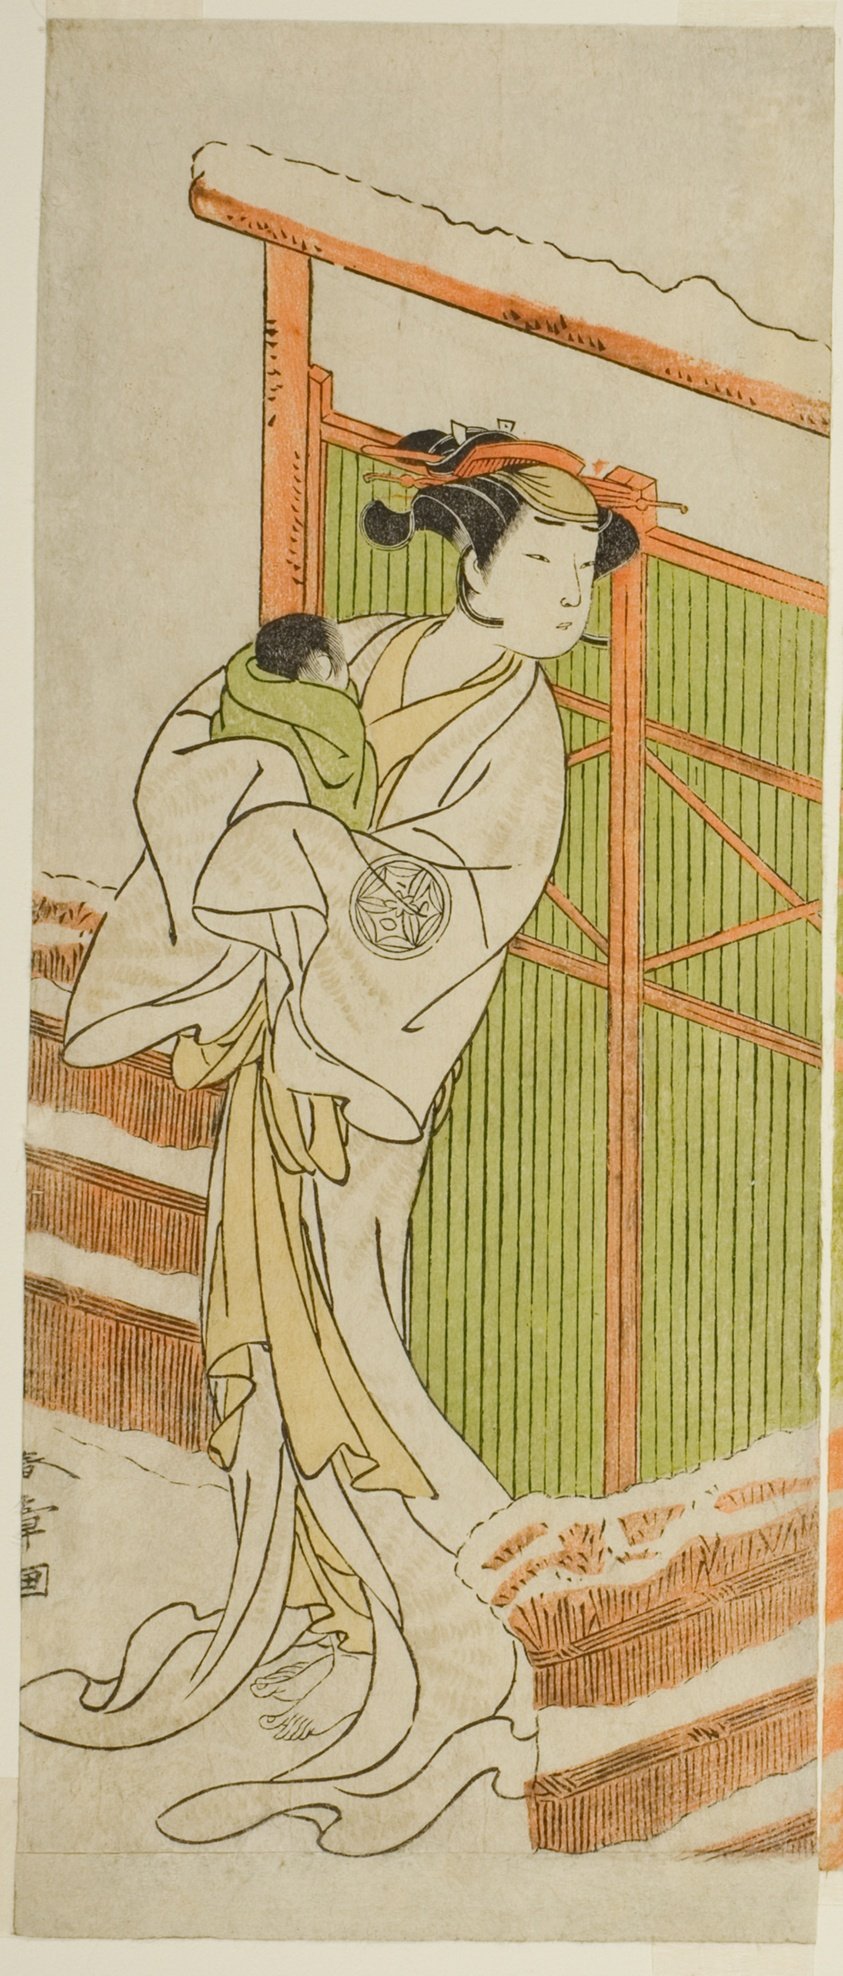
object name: Print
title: The Actor Yamashita Kinsaku II as Moshio in the Play Izu-goyomi Shibai no Ganjitsu, Performed at the Morita Theater in the Eleventh Month, 1772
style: Japanese (culture or style)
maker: Katsukawa Shunsho 勝川 春章; Japanese, 1726-1792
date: c. 1772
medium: Color woodblock print; hosoban; left sheet of diptych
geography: Japan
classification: woodblock print; print; asian art